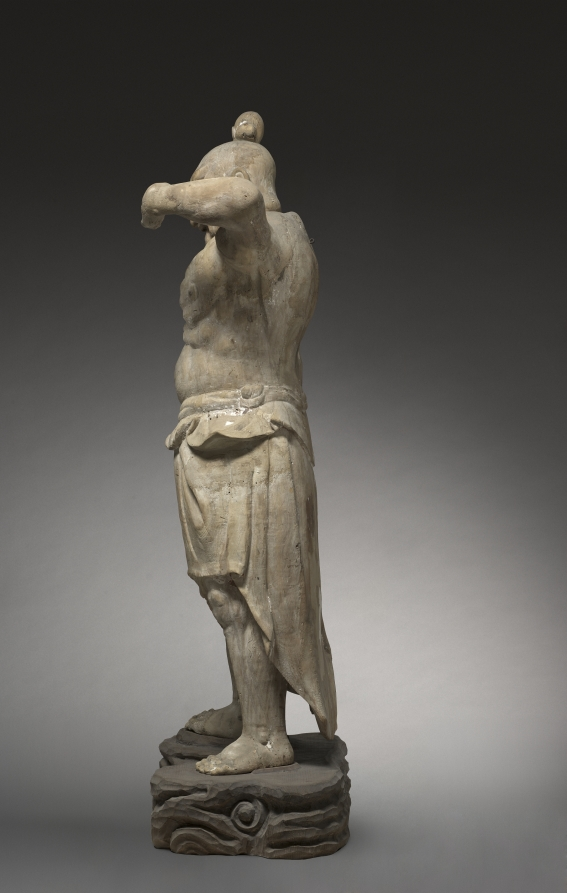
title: Guardian Figure: Nio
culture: Japan, Kamakura period (1185–1333)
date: 1200s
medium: chestnut and cypress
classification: Sculpture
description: Paired with a closed-mouth Nio, this figure originally protected the entrance of a Buddhist temple in Japan. Sculpted in an expressive, dynamic style, this figure was created using several pieces of wood carefully joined together. This imposing figure was originally painted, though is substantially faded due to weathering. The carved wooden bases for the two guardian figures on display are modern replacements.